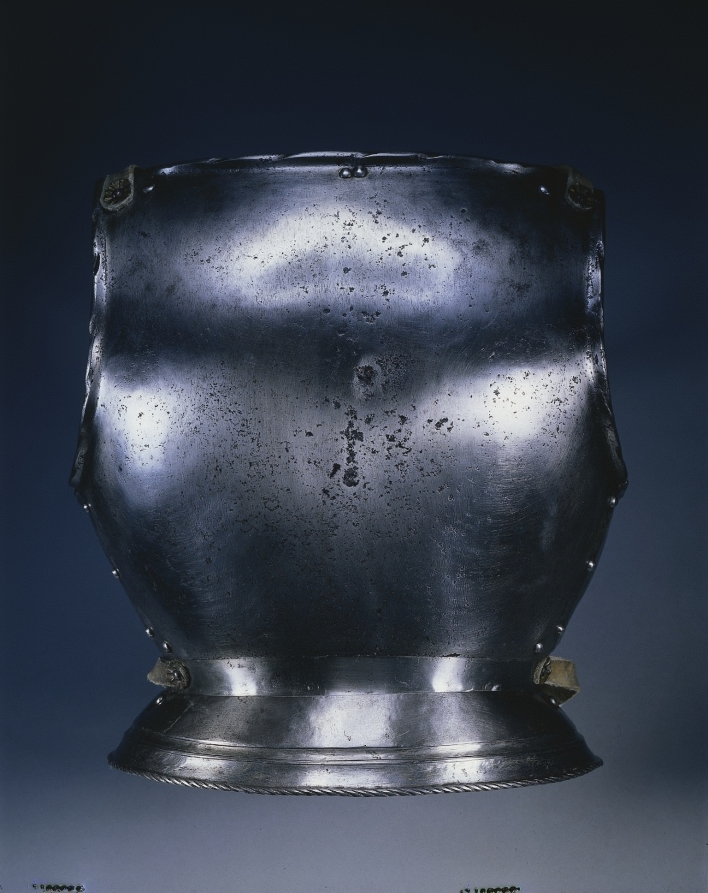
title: Backplate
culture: Germany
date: c.1510–30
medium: steel with black paint, leather straps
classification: Arms and Armor